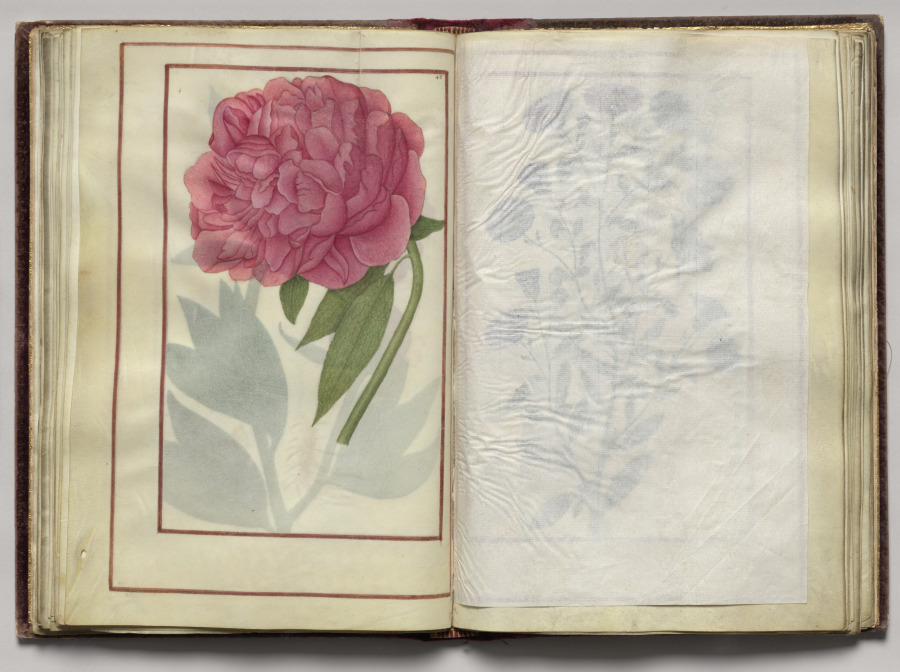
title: Pink Peony, folio 24 (verso), from Florilegium (A Book of Flower Studies)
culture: France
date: 1608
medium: watercolor, ink, silver, and gold over occasional traces of pencil, on vellum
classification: Bound Volume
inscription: Dated: Poitiers 1608 (on frontispiece) Signed: On frontispiece in black ink, lower right: Van Kuyk Notation on drawing: Frontispiece: in pencil, lower margin: * élève de Van Kessel, peintre flammand (* in pencil also appears in front of Van Kuyk's name).